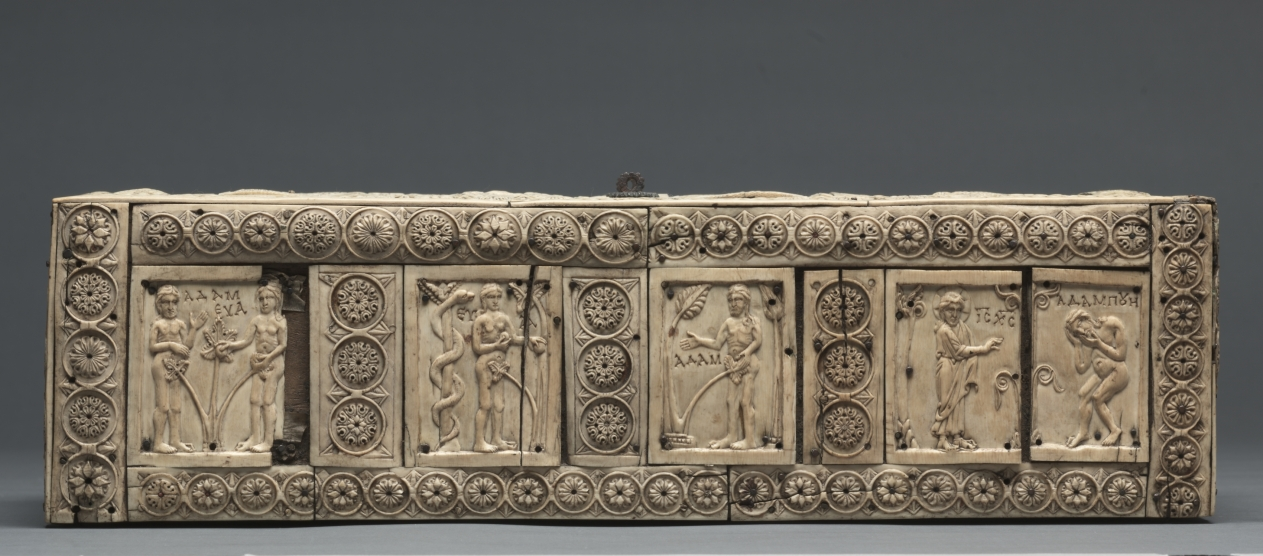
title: Ivory Box with Scenes of Adam and Eve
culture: Byzantium, Constantinople, Byzantine period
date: 1000–1100s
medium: ivory, wood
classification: Ivory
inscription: Greek inscriptions are included in each plaque.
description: Scenes from the Old Testament stories of Adam and Eve and their children, Cain and Abel, decorate this box, which may have been made to contain jewelry or small valuables. On its lid two plaques depict the creation of Adam and the creation of Eve from Adam’s rib. Two further plaques depict Cain slaying Abel: Cain throws a stone in the direction of Abel, who is hit by stones in the hip, chest, and head.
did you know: Carved out of imported ivory by skilled craftsmen, boxes such as these were used by Byzantine elites to store luxury goods such as jewelry.